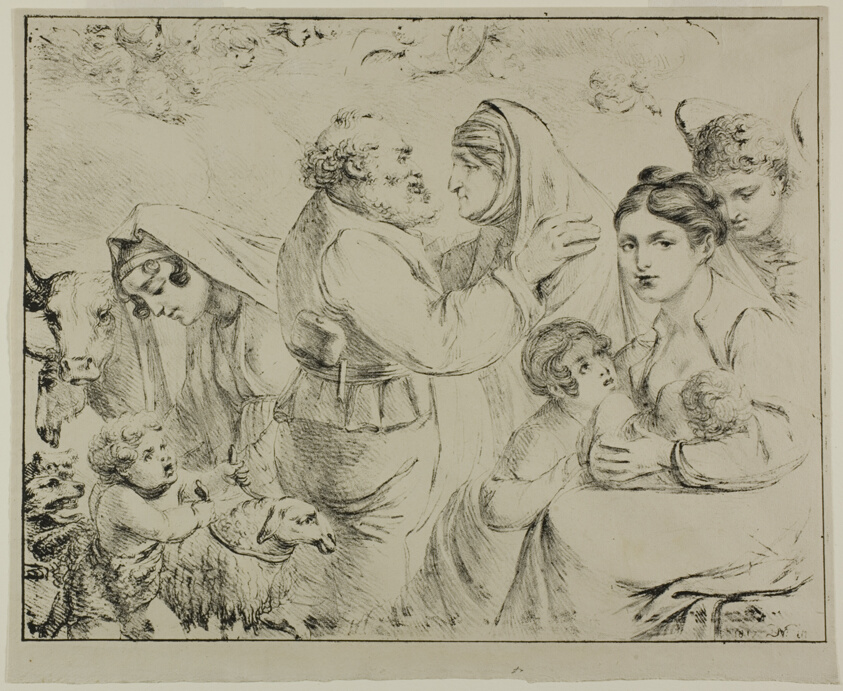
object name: Print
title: Allegory of Maternal Felicity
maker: Dominique-Vivant Denon (French, 1747-1825)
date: 1817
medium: Lithograph in black on gray wove paper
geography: France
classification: lithograph; print; prints and drawing